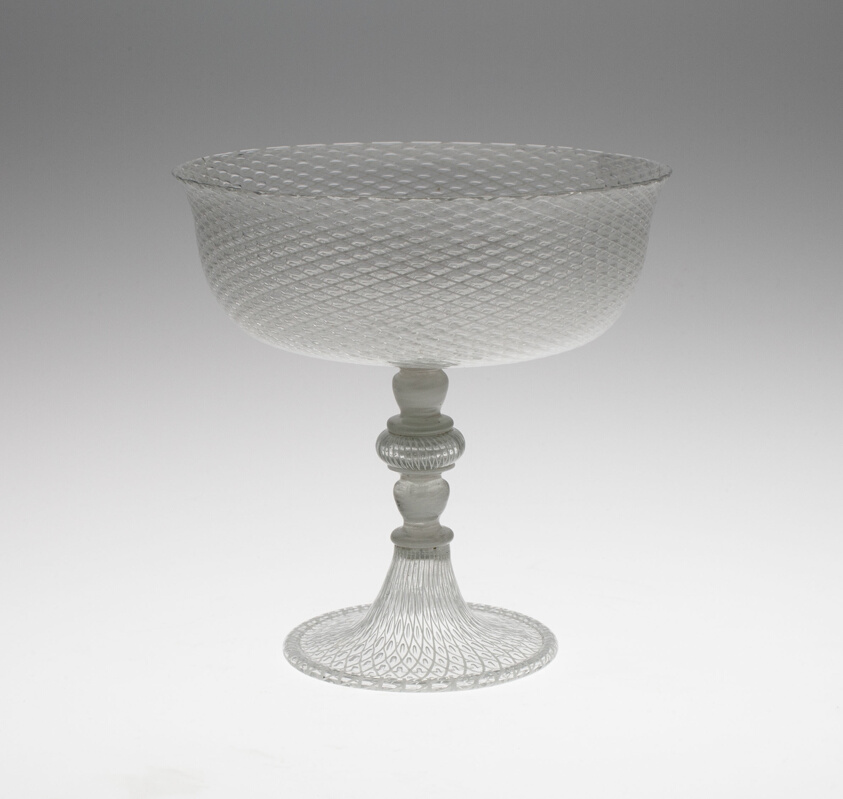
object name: Glass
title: Tazza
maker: Italy, Venice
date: c. 1680-1700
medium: Glass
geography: Venice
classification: drinking vessel; glass; european decorative arts